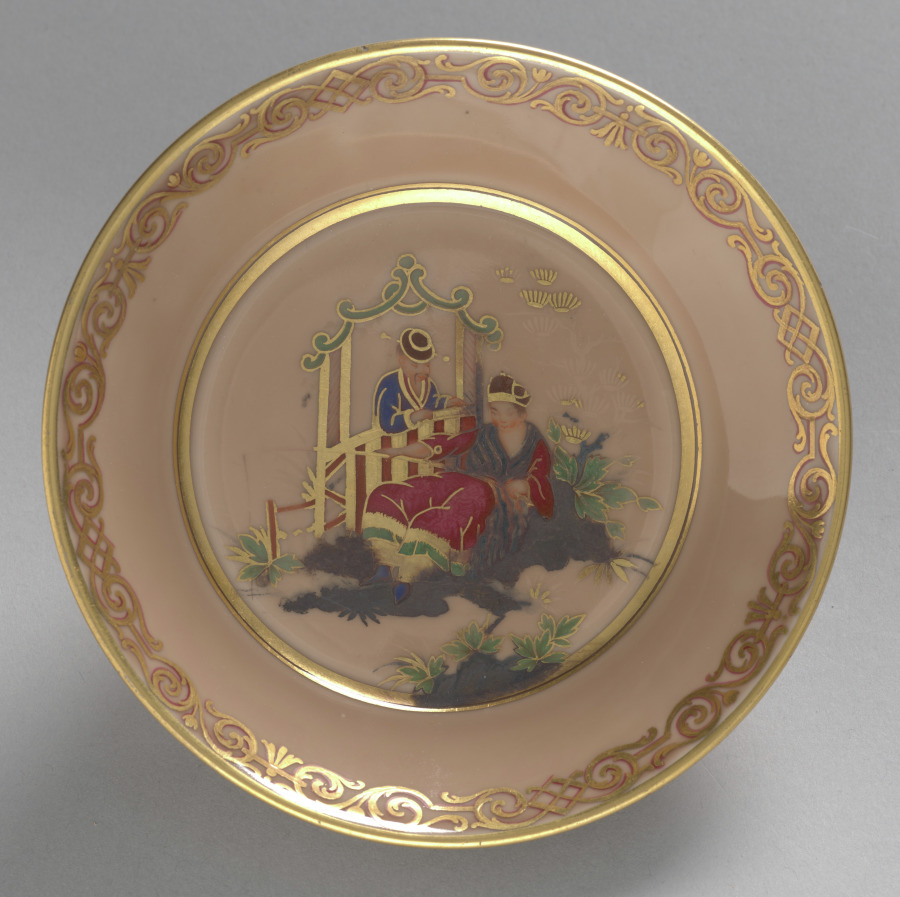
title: Saucer (Soucoupe)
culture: France, Sèvres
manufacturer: Sèvres Porcelain Factory (French, est. 1756)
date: 1778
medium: hard-paste porcelain with overglaze enamel decoration and gilt and silver decoration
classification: Ceramic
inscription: Interlaced Ls surmounted by a crown with date letters 'AA' enclosed; 'L.' below (in red); two underglaze dots (in blue)